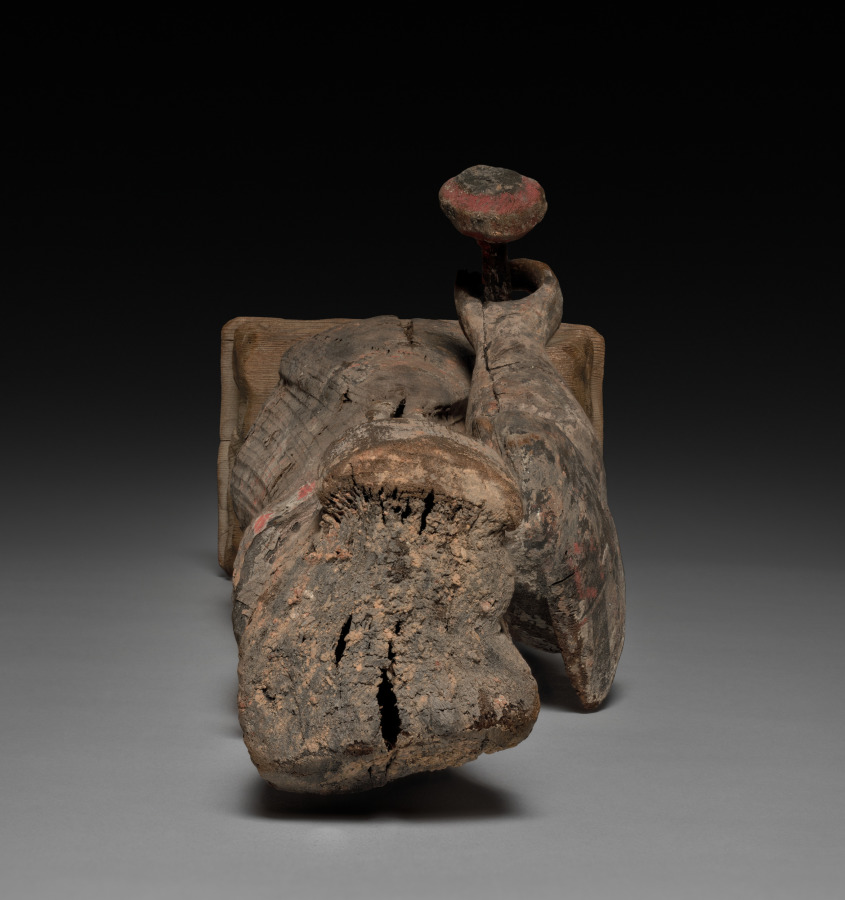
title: Figure with Sword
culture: China, Eastern Zhou dynasty (770–256 BCE), Warring States period (475–221 BCE)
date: 400–300 BCE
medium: wood with traces of polychromy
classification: Sculpture